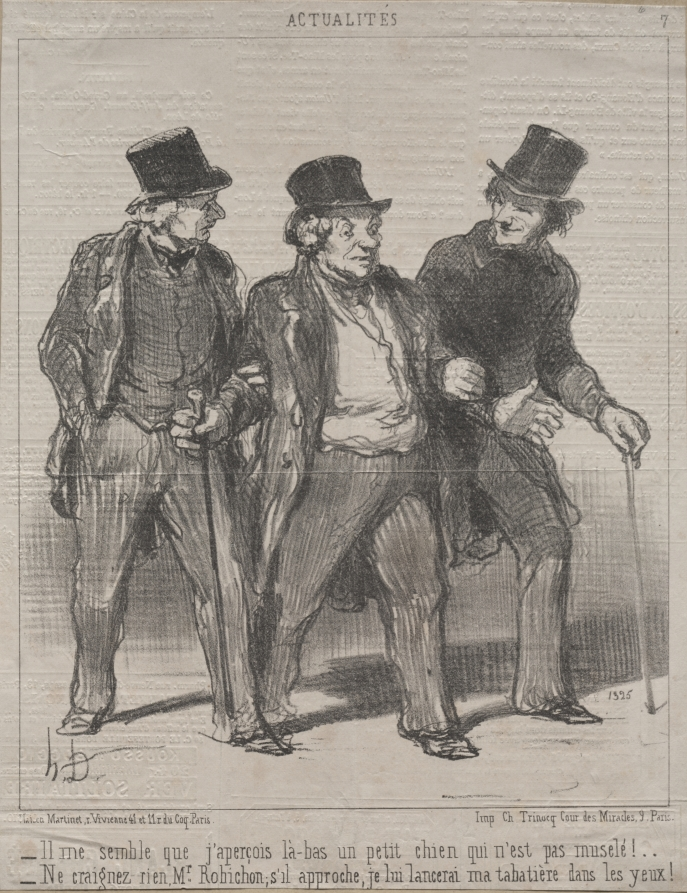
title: It seems to me that I notice a little dog there that is not muzzled!...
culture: France, 19th century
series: News of the Day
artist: Honoré Daumier (French, 1808–1879)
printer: Ch. Trinocq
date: 1852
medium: lithograph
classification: Print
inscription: Upper margin, pencil: 6 ; Lower margin, printed: Maison Martinet, r. Vivienne 41 et 11 r. du Coq. Paris / Imp. Ch. Trinocq Cour des Miracles, 9. Paris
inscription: Above image, printed: ACTUALITÉS. / 7 ; Below image, printed: - Il me semble que j'apercois là-bas un petit chien qui n'est pas musele! ... / - Ne craignez rien, Mr. Rohichon; s'il approche, je lui lancerai ma tabatière dans les yeux!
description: This print was published in Le Charivari (July 23, 1852) as plate 7 from the series News of the Day.